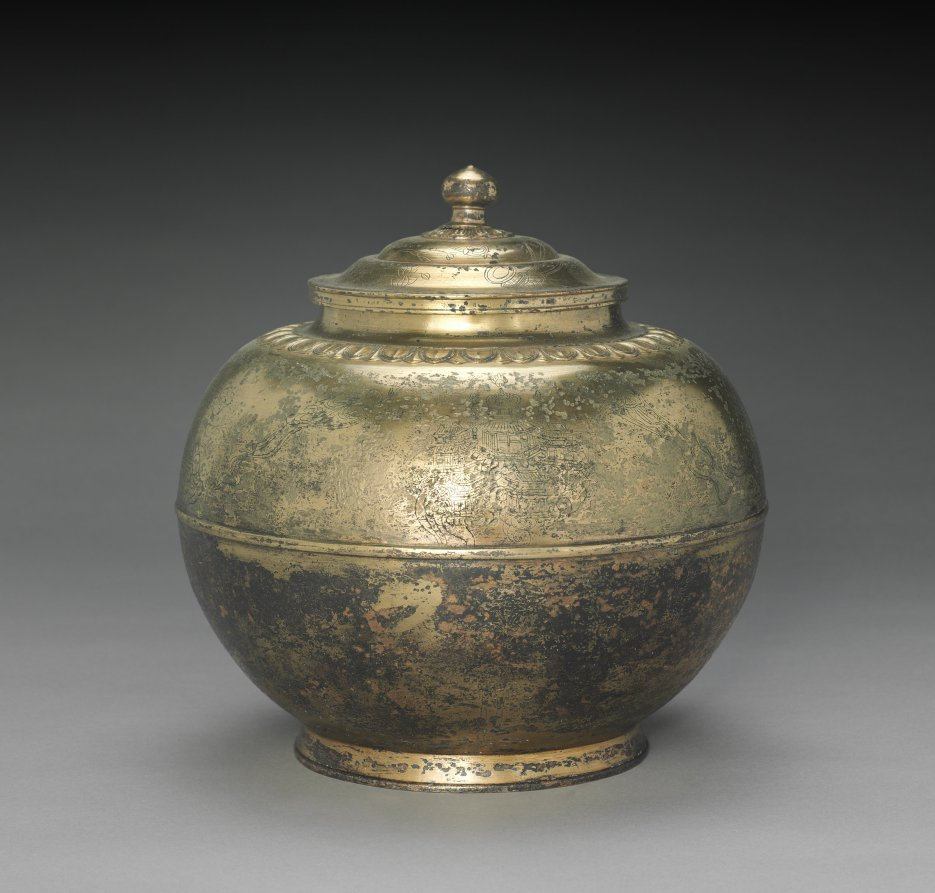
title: Cinerary Urn with Amida's Pure Land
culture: Japan, Heian period (794–1185)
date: 800s-900s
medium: gilt bronze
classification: Metalwork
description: This urn once held someone’s ashes. It is decorated with images of the Pure Land of Amida, the Buddha of Infinite Life and Light. Heian-period devotees of Amida believed that if they called upon his name with sincerity at the moment of death, they would be born into his Pure Land, also known as the Western Paradise, and thereby escape the pattern of reincarnation. As shown on the lid of the urn, in the Pure Land, musical instruments float about playing by themselves. Its palatial structures and magnificent lotus pond are described on the body of the urn.